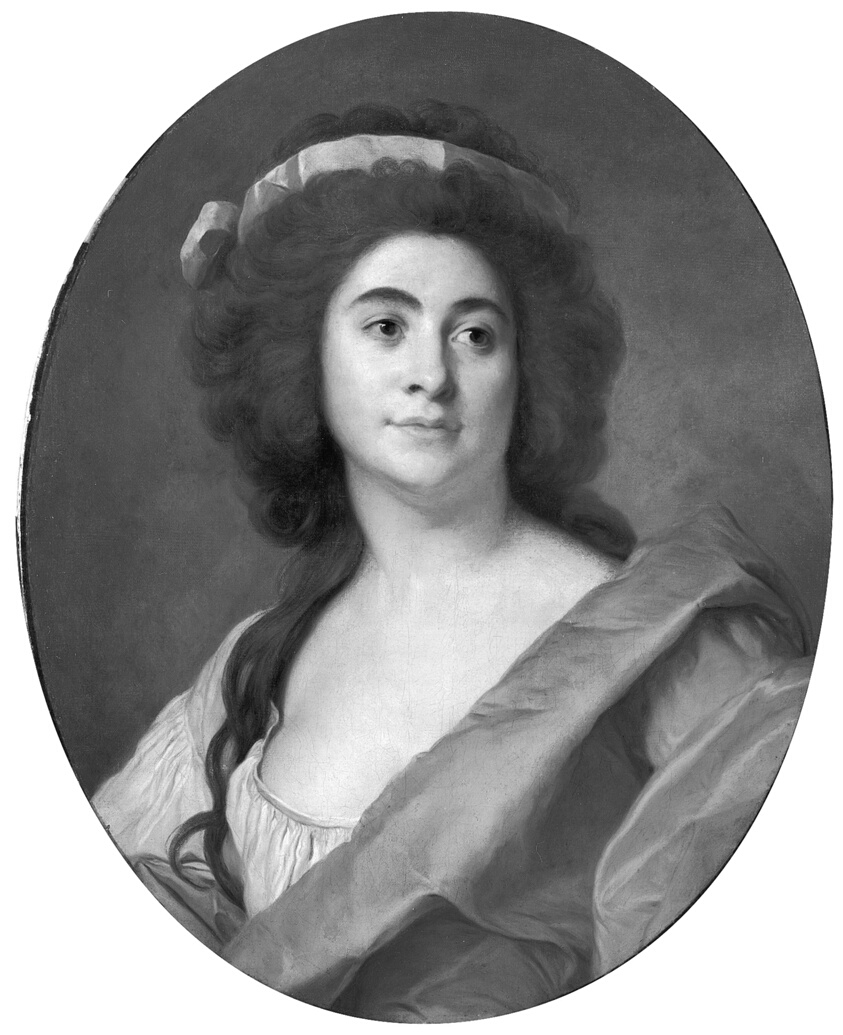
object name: Painting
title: Portrait of a Lady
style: 18th Century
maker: Joseph Siffred Duplessis (French, 1725–1802)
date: c. 1787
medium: Oil on canvas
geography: France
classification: oil on canvas; france; french; oil paintings (visual works); paint; portrait; painting; european painting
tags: portraits: female subject, fashion, portrait, portraits, woman